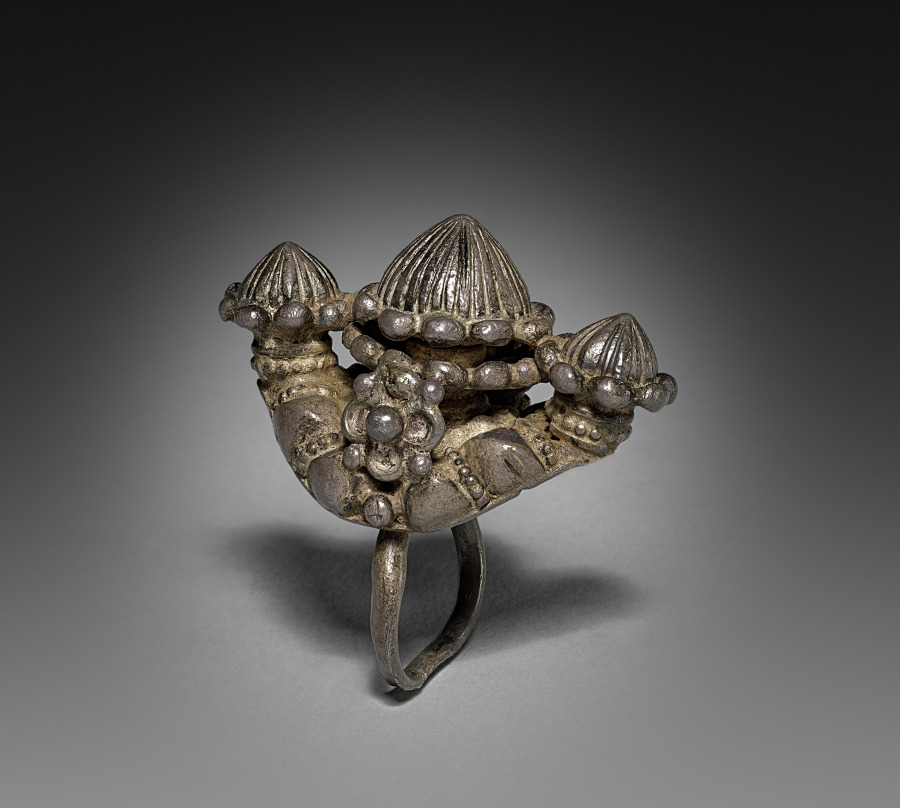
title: Toe Ring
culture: India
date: 1800s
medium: silver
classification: Jewelry